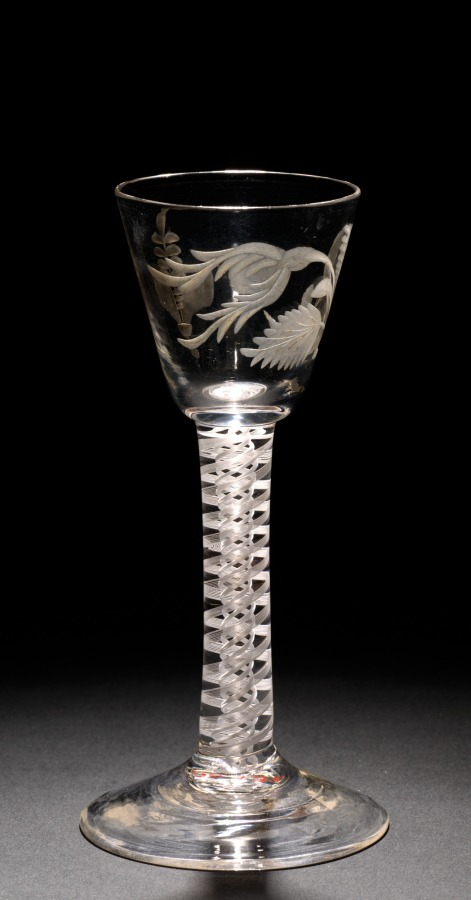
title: Wine Glass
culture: England, 18th century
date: 1750–1799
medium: glass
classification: Glass